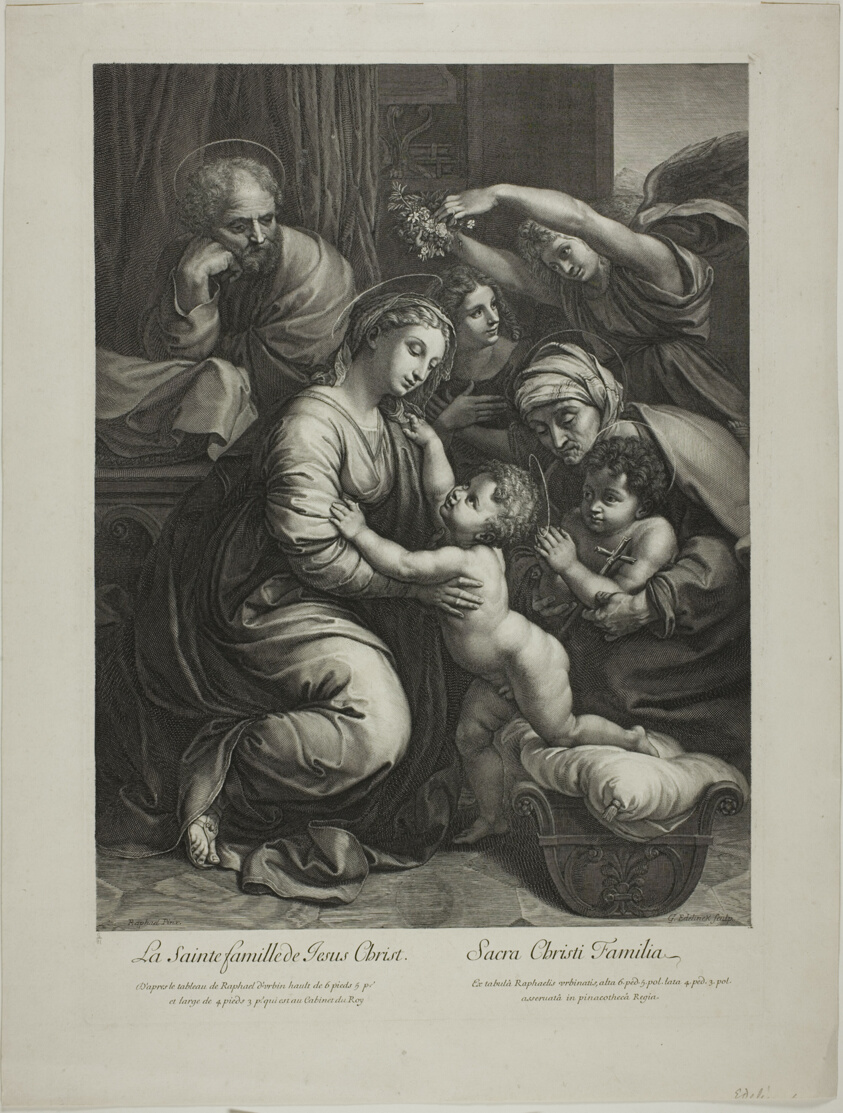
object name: Print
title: Holy Family of Jesus Christ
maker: Gérard Edelinck (French, born Flanders, 1640-1707); after Raffaello Sanzio, called Raphael (Italian, 1483-1520)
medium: Engraving on cream laid paper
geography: France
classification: engraving; print; prints and drawing